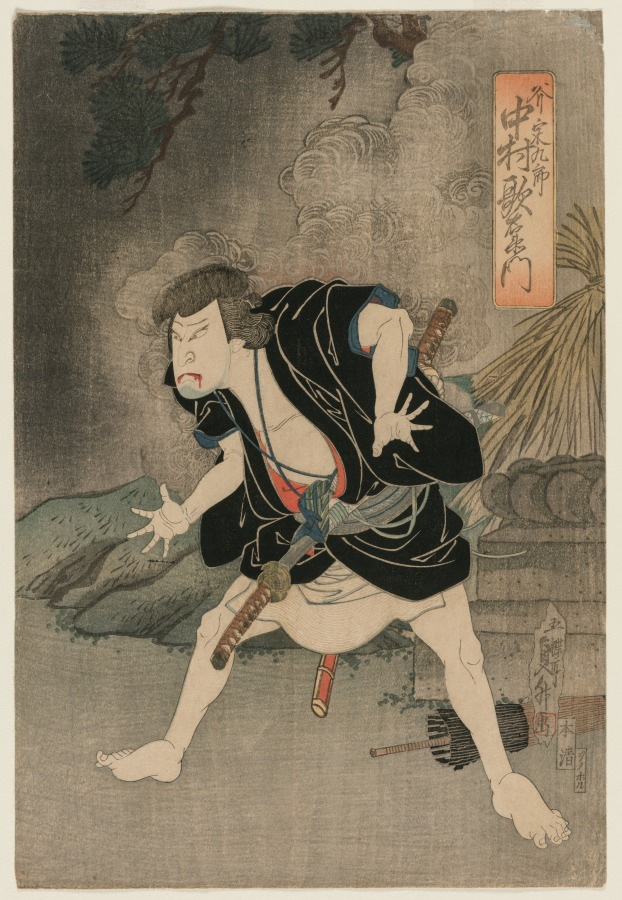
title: Nakamura Utaemon IV as Ono Sadakuro in Act Five of Kanadehon Chushingura, Naka Theater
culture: Japan, Edo period (1615–1868)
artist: Utagawa Sadamasu (Japanese)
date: 1838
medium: color woodblock print with silver and embossing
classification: Print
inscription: Signature: Gochotei Sadamasu ga Artist Seal: Sada (?) Publisher: Shohonya Seishichi (Honsei) Engraver: Ono horu